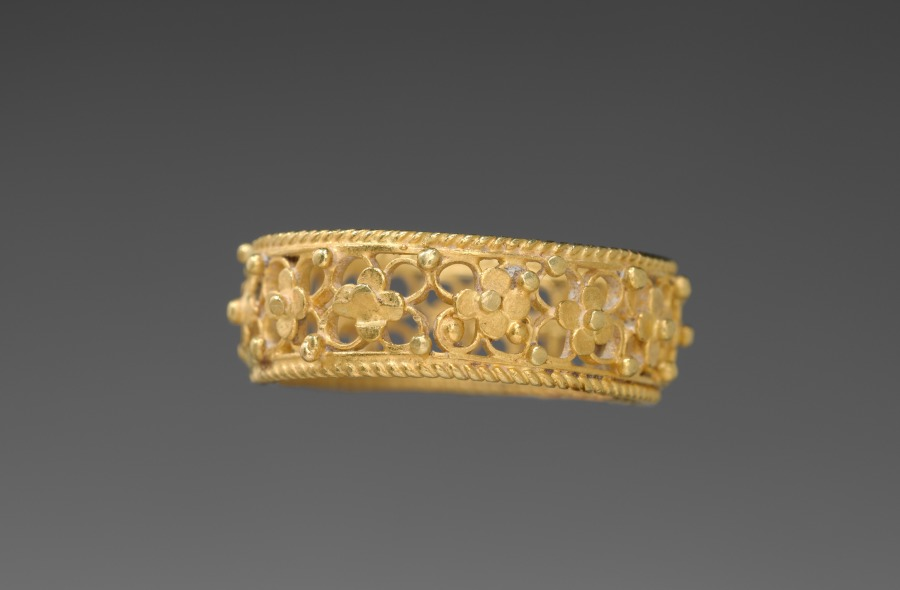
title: Ring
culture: India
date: early 1900s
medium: silver gilt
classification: Jewelry